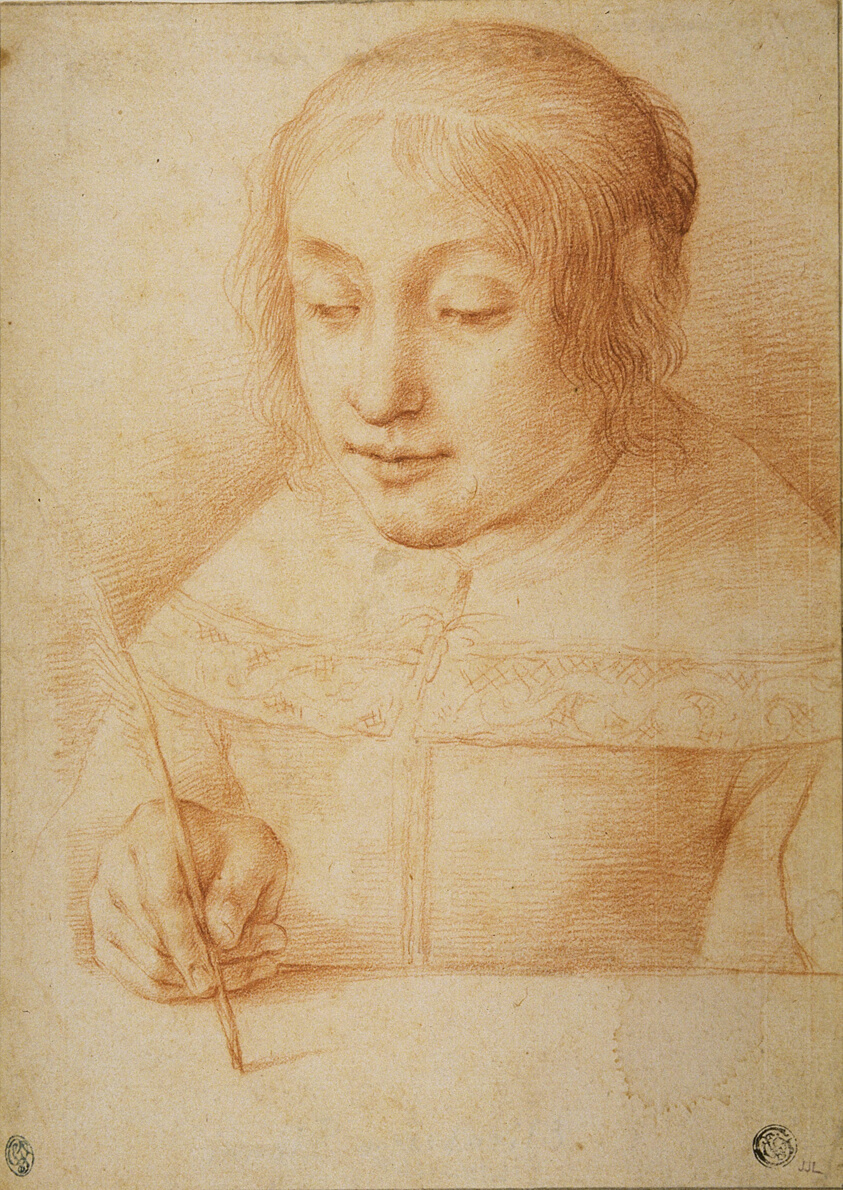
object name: Drawing and Watercolor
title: Young Woman Writing or Drawing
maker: Attributed to Elisabetta Sirani; Italian, 1638-1665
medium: Red chalk on cream laid paper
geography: Italy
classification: chalk; drawings (visual works); prints and drawing